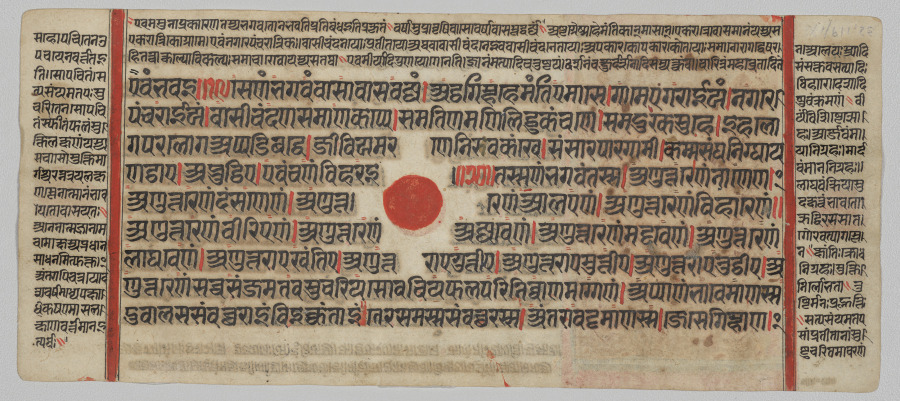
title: Text, Folio 39 (recto), from a Kalpa-sutra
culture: Western India, Gujarat, last quarter of the 15th century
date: c. 1475–1500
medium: Gum tempera, ink, and gold on paper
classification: Painting